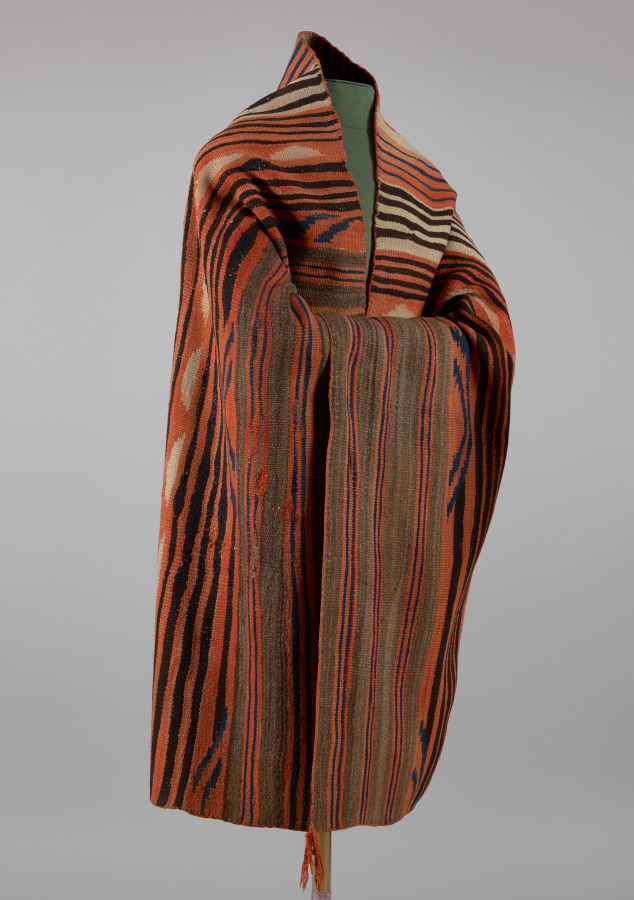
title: Banded Wearing Blanket (Diyugi)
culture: America, Native North American, Southwest, Diné (Navajo) or Zuni Pueblo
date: c. 1880–90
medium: Wool (handspun and bayeta): tapestry weave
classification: Textile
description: This blanket was created during the late 1800s, when weavers in the Southwest began to shift from making garments for Indigenous use, including trade, to additionally create items for non-Native collectors. In this new market, traditional wearing blankets, which were worn around the shoulders, were marketed as rugs.